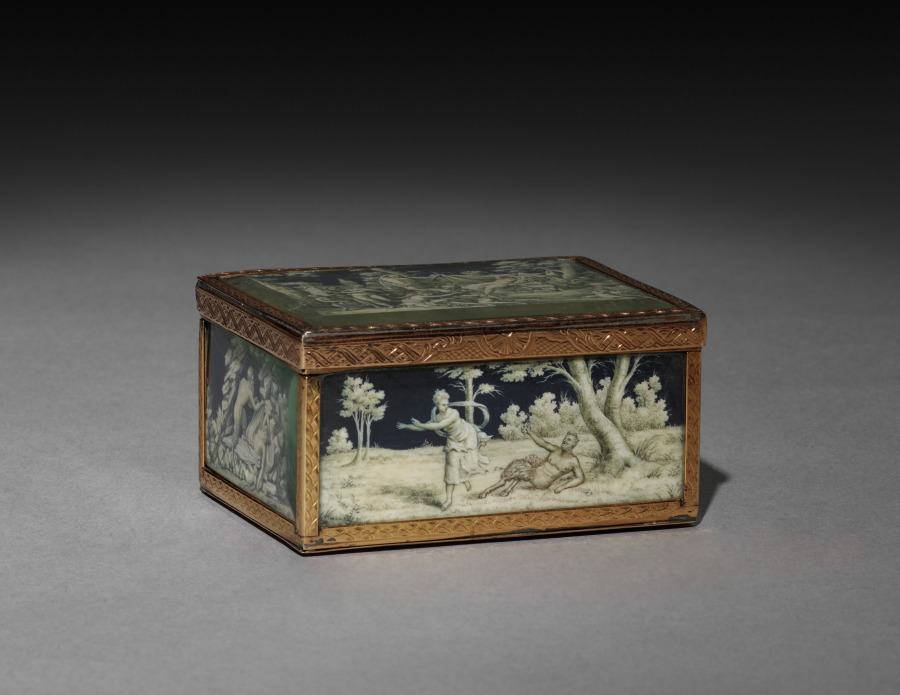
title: Box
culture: France, 19th century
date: 1800s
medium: painted miniatures under glass mounted in gold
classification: Miscellaneous